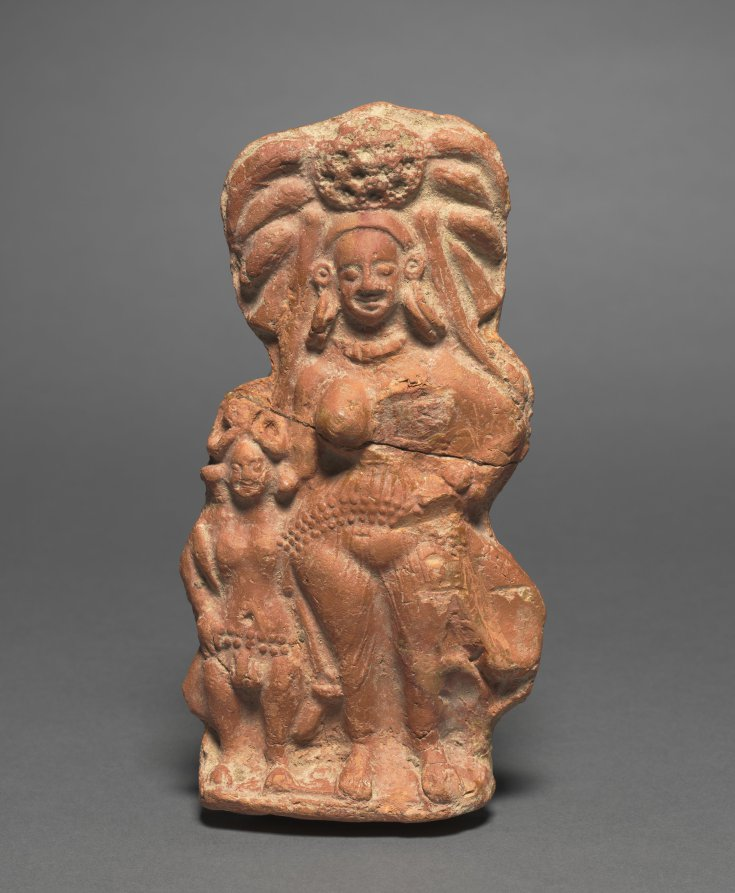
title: Nature Divinity (Yakshi) with Dwarf Hermaphrodite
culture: India, Shunga period (185–78 BCE)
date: c. 100 BCE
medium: terracotta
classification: Sculpture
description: Nature divinities, or yakshis, are associated with the life-giving forces of plants, so her headdress includes a dramatic array of leaves and flowers. Her companion, a female figure with male genitalia, is a dwarf who has connections with the fecundity of the earth. Terracotta figurines were often venerated in domestic shrines for the ongoing prosperity of the family.